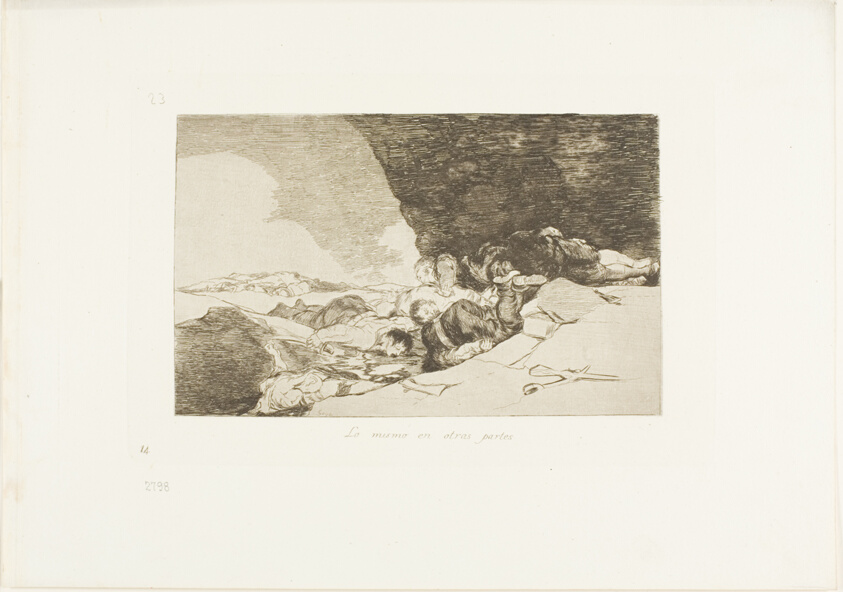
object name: Print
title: The Same Elsewhere, plate 23 from The Disasters of War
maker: Francisco José de Goya y Lucientes (Spanish, 1746-1828)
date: 1810/12, published 1863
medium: Etching, lavis, drypoint and burin on ivory wove paper with gilt edges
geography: Spain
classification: etching; print; prints and drawing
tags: war